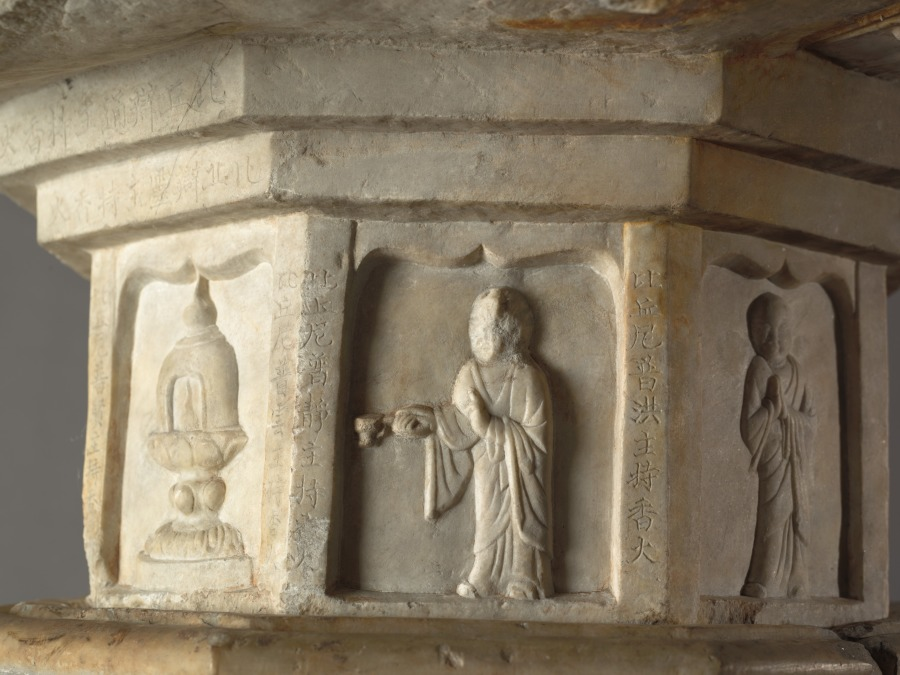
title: Fang Xuanling Pedestal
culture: China, Tang dynasty (618-907)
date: 647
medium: marble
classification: Sculpture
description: This double lotus pedestal exhibits the rich, ornate style of early Tang sculpture. It was commissioned by the Duke of Liang, Fang Xuanling (578–648), for the blessing of his second son and daughter-in-law, the Tang imperial princess of Gaoyang. The iconography and inscription suggest that it originally went with a statue, now missing, of Shakyamuni, the historical Buddha, instead of Amitayus. Today the pedestal is topped with Amitayus, the Buddha of Infinite Life, seated in meditation. Although the pedestal was not made with the statue, the combination is faithful to the original artistic conception.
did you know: In front, the top layer of the pedestal has an abstract curvilinear motif suggesting drapery; the rear is carved with a flower-and-leaf motif.